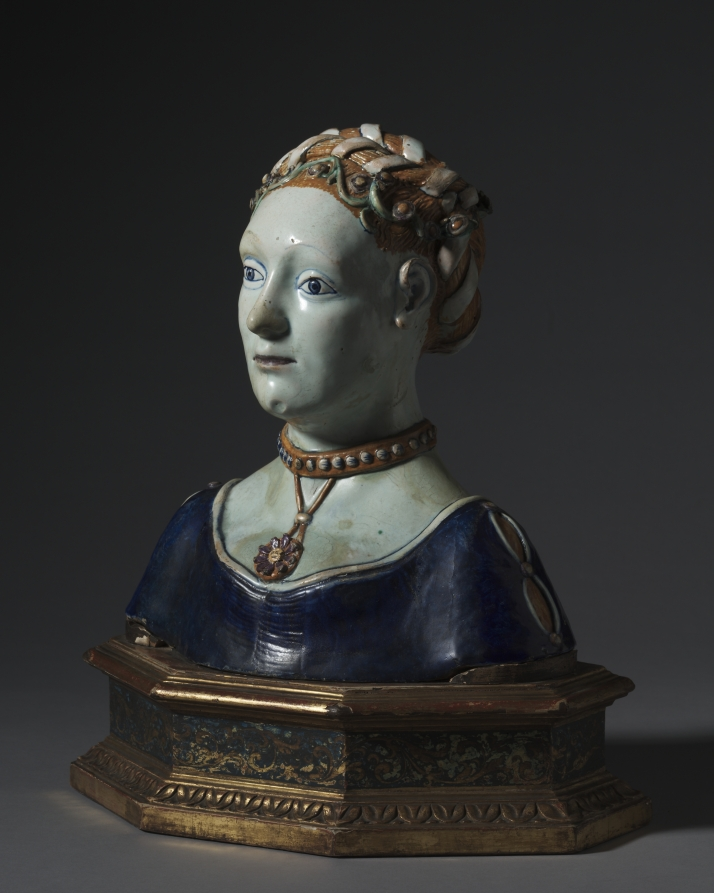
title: Bust of a Woman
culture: Italy, Tuscany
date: early 1500s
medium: tin-glazed earthenware (maiolica)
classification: Sculpture